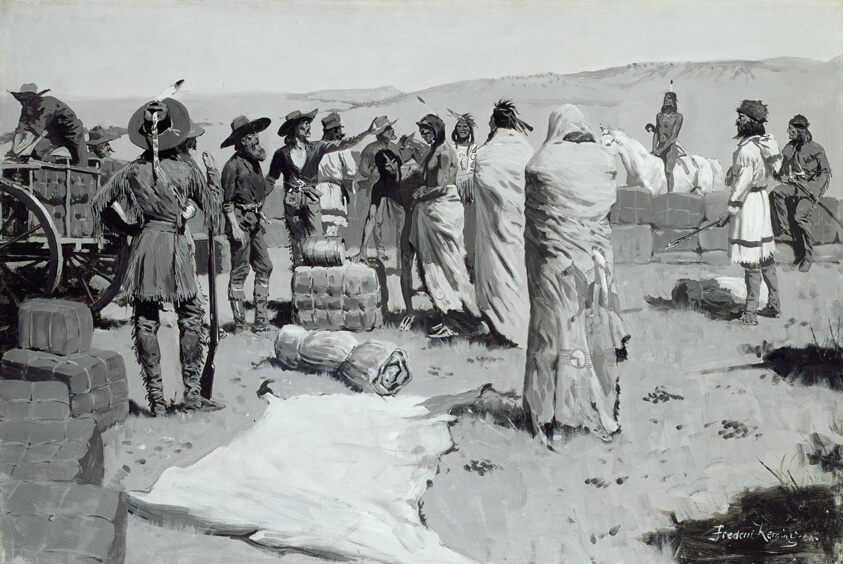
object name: Painting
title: The Interpreter Waved at the Youth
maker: Frederic Remington (American, 1861–1909)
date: c. 1900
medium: Oil on canvas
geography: United States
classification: painting; american arts